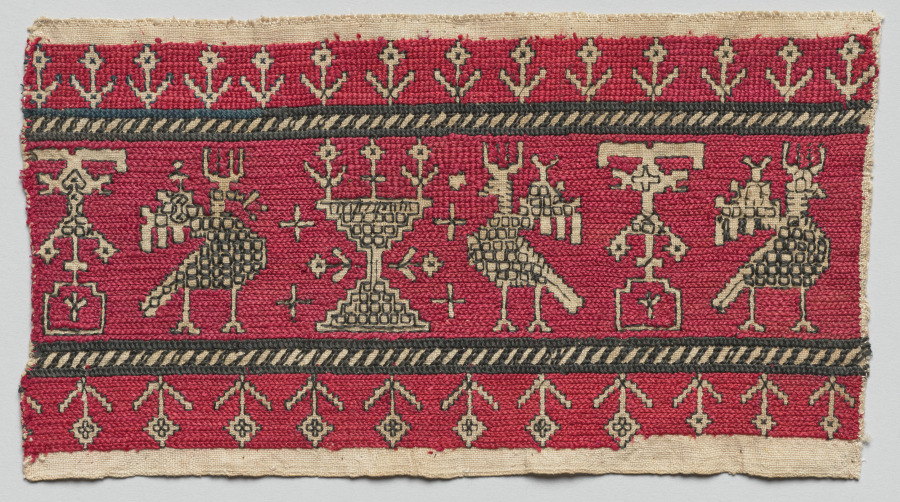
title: Fragment of a furnishing textile (one of five)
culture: Africa, North Africa, Morocco, Azemmour, Moroccan embroiderer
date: 1700s–1800s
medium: Linen, silk, dye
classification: Embroidery